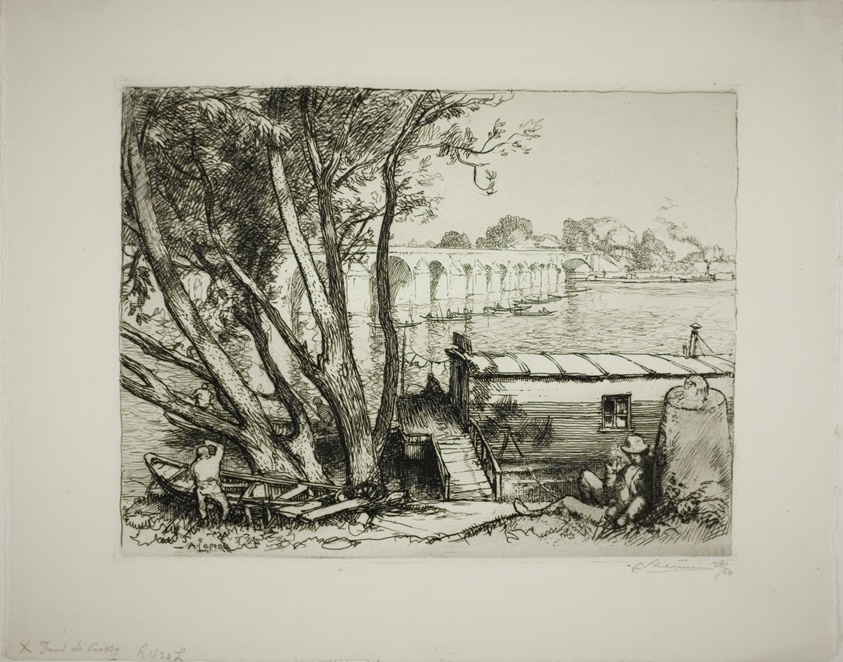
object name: Print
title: Poissy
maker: Louis Auguste Lepère (French, 1849-1918)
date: 1908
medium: Etching on cream wove paper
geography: France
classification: etching; print; prints and drawing